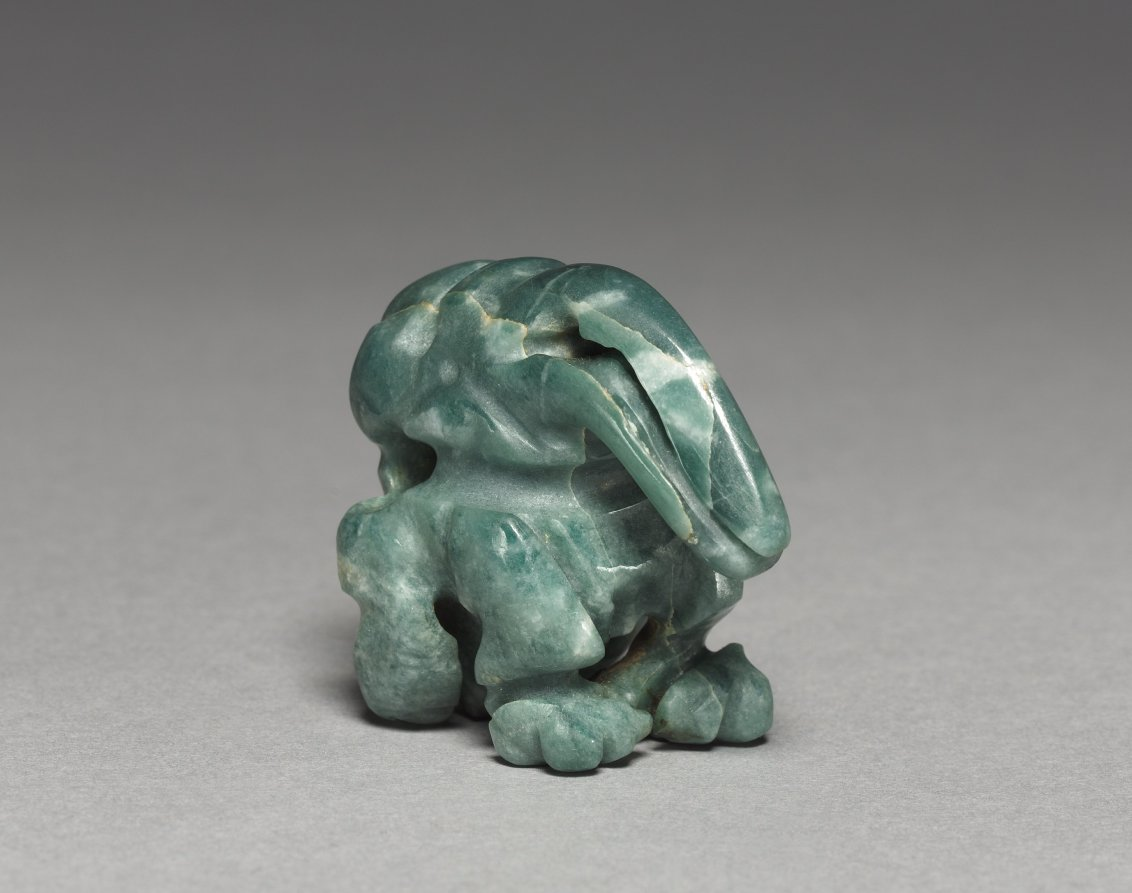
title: Bird Pendant (Buzzard or Vulture?)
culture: Costa Rica, Atlantic Watershed region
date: c. 300 BCE–600 CE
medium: jadeite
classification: Jewelry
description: Before about AD 500, when gold-working technologies were adopted in Costa Rica, jade was the quintessential luxury material and it was masterfully carved into exquisite ornaments of many kinds. Ancient Americans did not use many metal tools, and artists carved jade, a tough stone, with implements of stone, bone, bamboo, or reed.